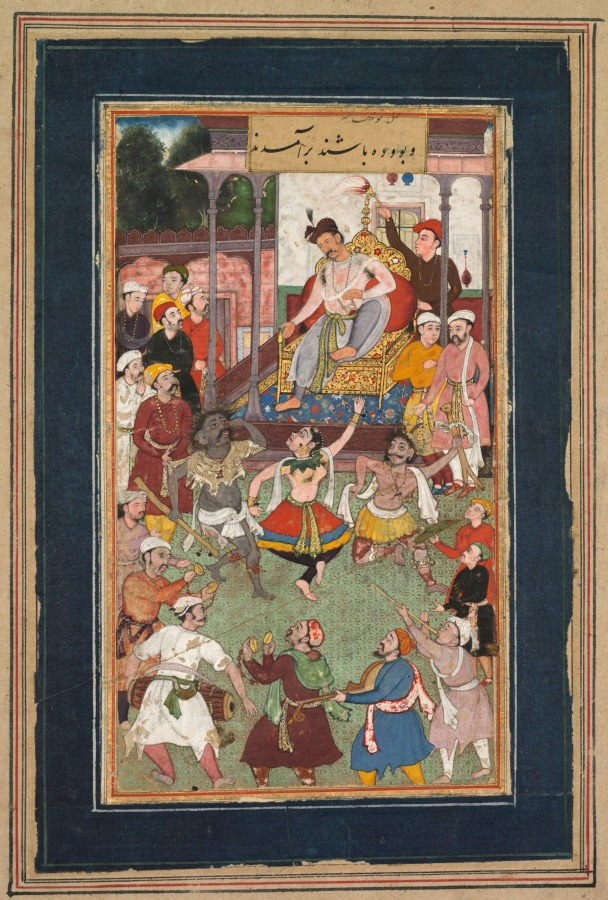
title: Grotesque Dancers Performing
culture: Mughal India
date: c. 1600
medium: gum tempera, ink, and gold on paper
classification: Painting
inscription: Unrelated later Persian text on recto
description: This scene from an unidentified manuscript depicts entertainers at the Mughal court. The dancers appear to be from the fringes of society, and they may be intended to depict tribal people or semihuman nature spirits. One is dark skinned with small elephant ears and red-rimmed eyes, wearing a white tiger-skin pelt. The female dancer wears a collar of leaves; the male figure on the right has horns, wears bells, and carries an animal-headed club that appears to be made of bone. An exuberant orchestra provides musical and vocal accompaniment below. While not an imperial production, this painting may reference the Mughal emperor Akbar’s practice of welcoming a wide range of people from all regions and traditions to his court, since he was interested in understanding their customs.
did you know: Akbar applied an aromatic paste under his arms, which stained his garment.